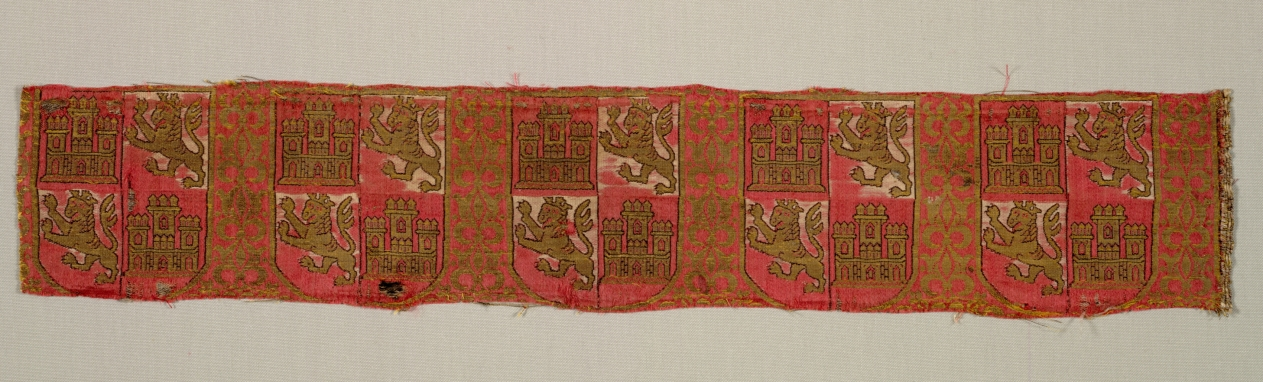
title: Lampas with heraldry of Castile and León, from a royal Christian robe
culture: Spain, Granada, Nasrid period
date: 1200–1325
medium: lampas: silk and gold thread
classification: Textile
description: Opulent gold thread forms heraldic shields of a Spanish king on a palmette ground. The shield bears the heraldic device of Castile and Leon, the castle and lion, which had decorated imperial Spanish garments for several centuries. The use of coats of arms was a European convention that was never adopted by the Muslims.